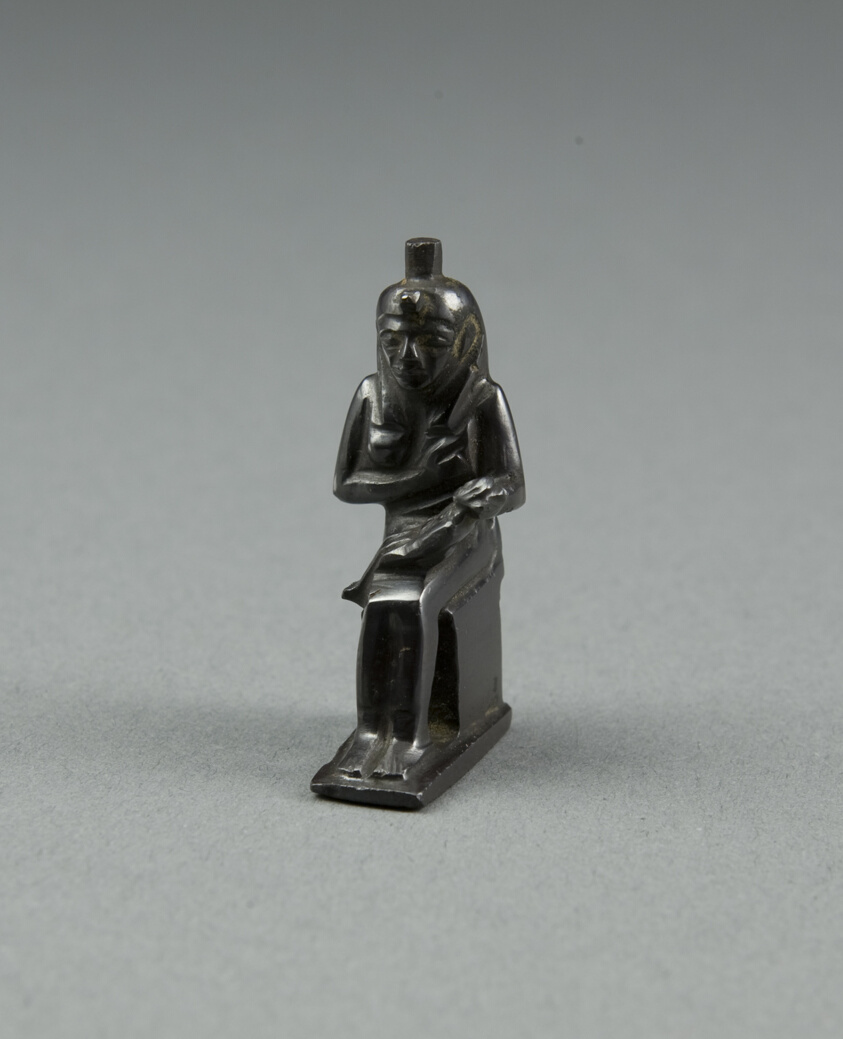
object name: Costume and Accessories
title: Amulet of the Goddess Isis Nursing the God Horus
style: third intermediate period, egyptian, ancient, kushite, twenty-fifth dynasty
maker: Egyptian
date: Third Intermediate Period, Dynasty 25 (about 747–656 BCE)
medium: Hematite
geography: Egypt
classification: amulet; stone; jewelry; ancient art; costume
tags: nursing (breast feeding), goddesses, gods (deities)